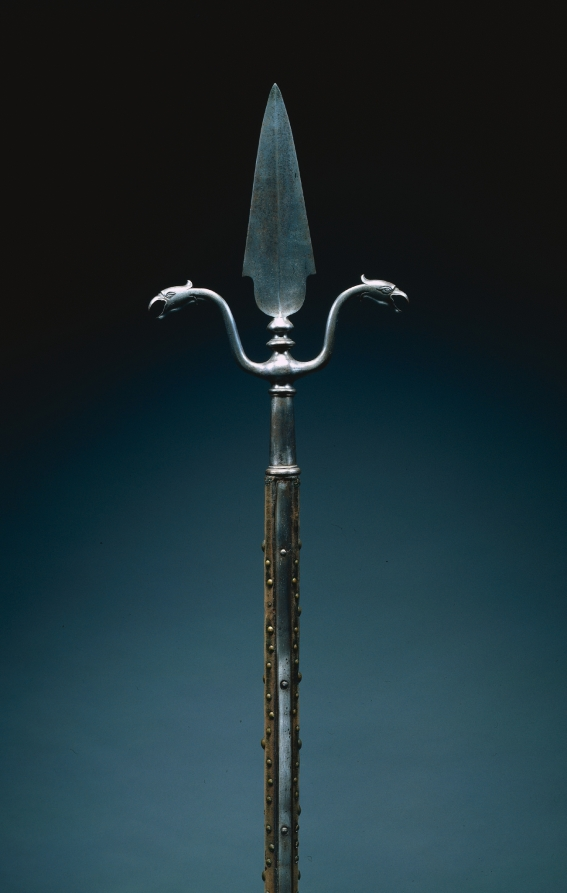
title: Linstock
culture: France, 17th century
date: c. 1600–25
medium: steel; octagonal wood haft covered with green velvet, brass studs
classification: Arms and Armor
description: This specialized staff weapon was used primarily to ignite the charge in pieces of artillery. The two lateral projections ending in eagles' heads are actually clips designed to hold the smoldering matches that allowed the firer to stand a little further from the cannon. The short, leaf-shaped blade allowed the linstock to be used as a weapon if necessary.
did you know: The tapestries and weaponry adorning the walls of the Armor Court are not props. Located near the portrait of Agostino Barbarigo, this linstock hangs to the far right of a grouping of weapons. The blade ends in a double snake design and is attached to a solid wood handle.